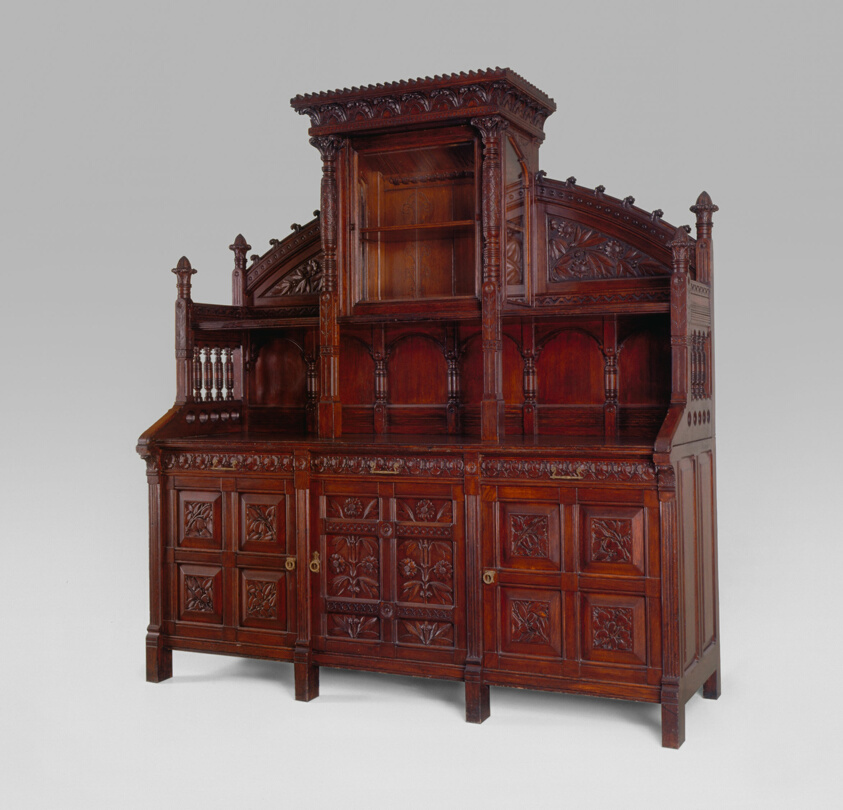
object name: Furniture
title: Sideboard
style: Arts and Crafts Movement, American Arts and Crafts Movement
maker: Herter Brothers (American, 1864–1906)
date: 1876–80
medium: Oak with white pine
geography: New York City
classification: case furniture; furniture; american decorative arts; american arts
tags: furniture